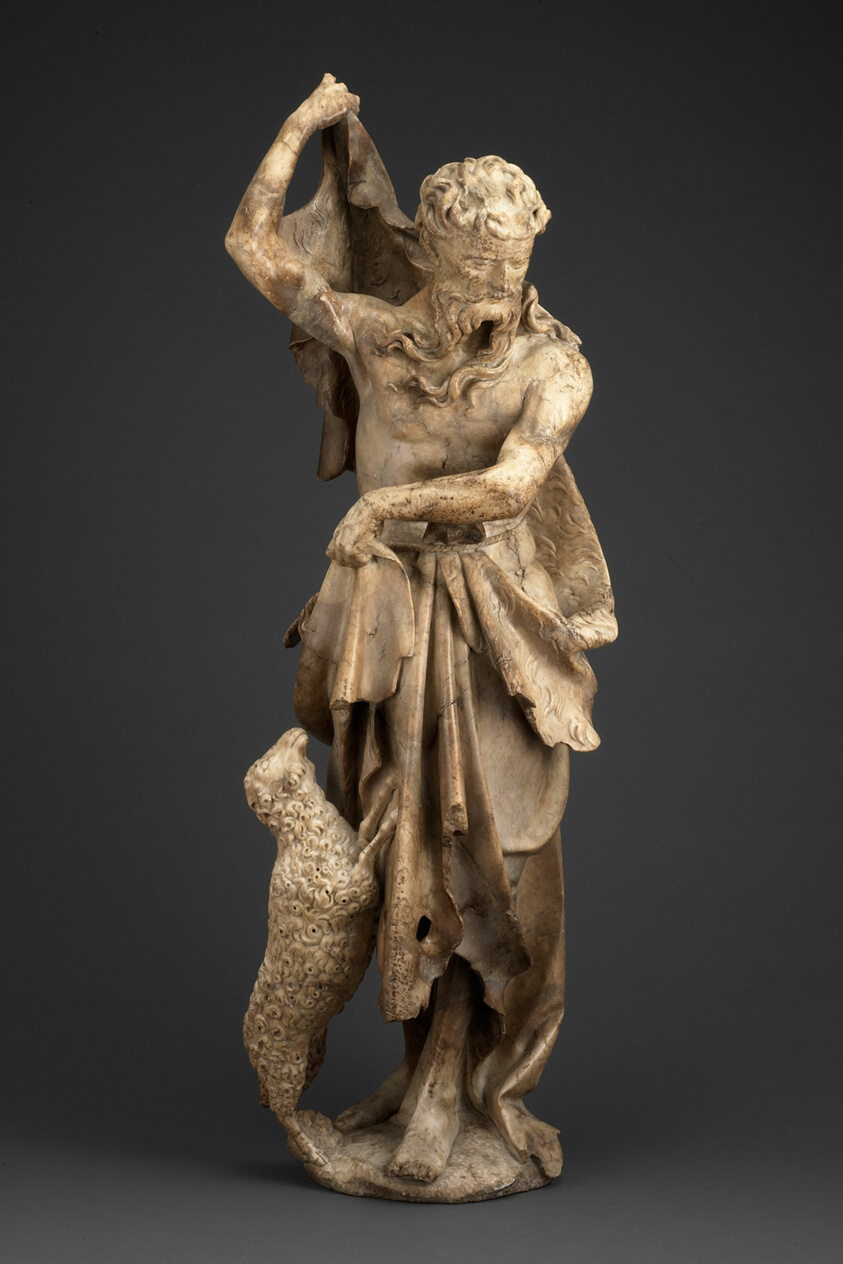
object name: Sculpture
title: Saint John the Baptist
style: sixteenth century, 16th Century, Renaissance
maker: Spanish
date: c. 1550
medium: Alabaster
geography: Spain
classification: statuette; sculpture; sculpture/stone; spanish; stone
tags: Saint John the Baptist, animals, Christian subjects, Christianity, cloth, Devotion, lamb, man, religion, religious, religious figures, saints